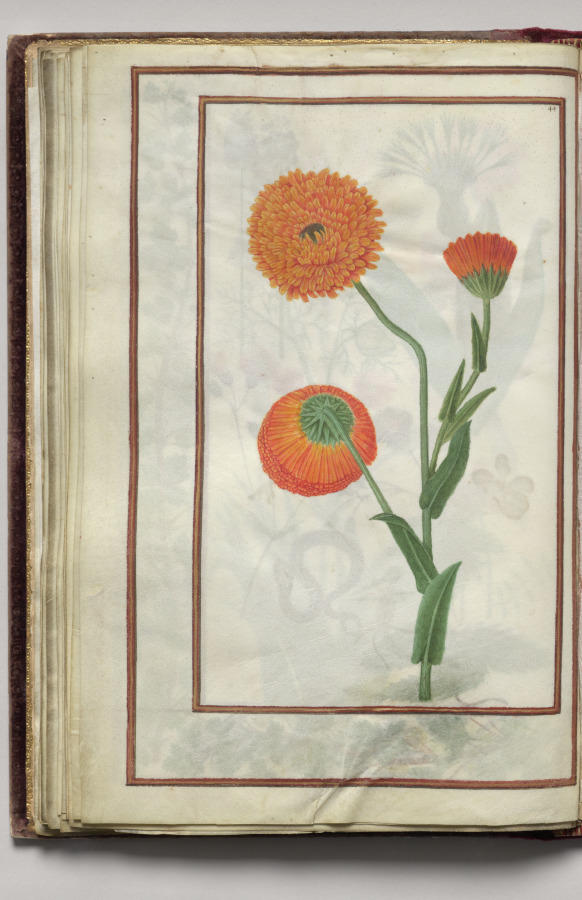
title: Orange Caligula, folio 22 (verso), from Florilegium (A Book of Flower Studies)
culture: France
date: 1608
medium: watercolor, ink, silver, and gold over occasional traces of pencil, on vellum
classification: Bound Volume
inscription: Dated: Poitiers 1608 (on frontispiece) Signed: On frontispiece in black ink, lower right: Van Kuyk Notation on drawing: Frontispiece: in pencil, lower margin: * élève de Van Kessel, peintre flammand (* in pencil also appears in front of Van Kuyk's name).